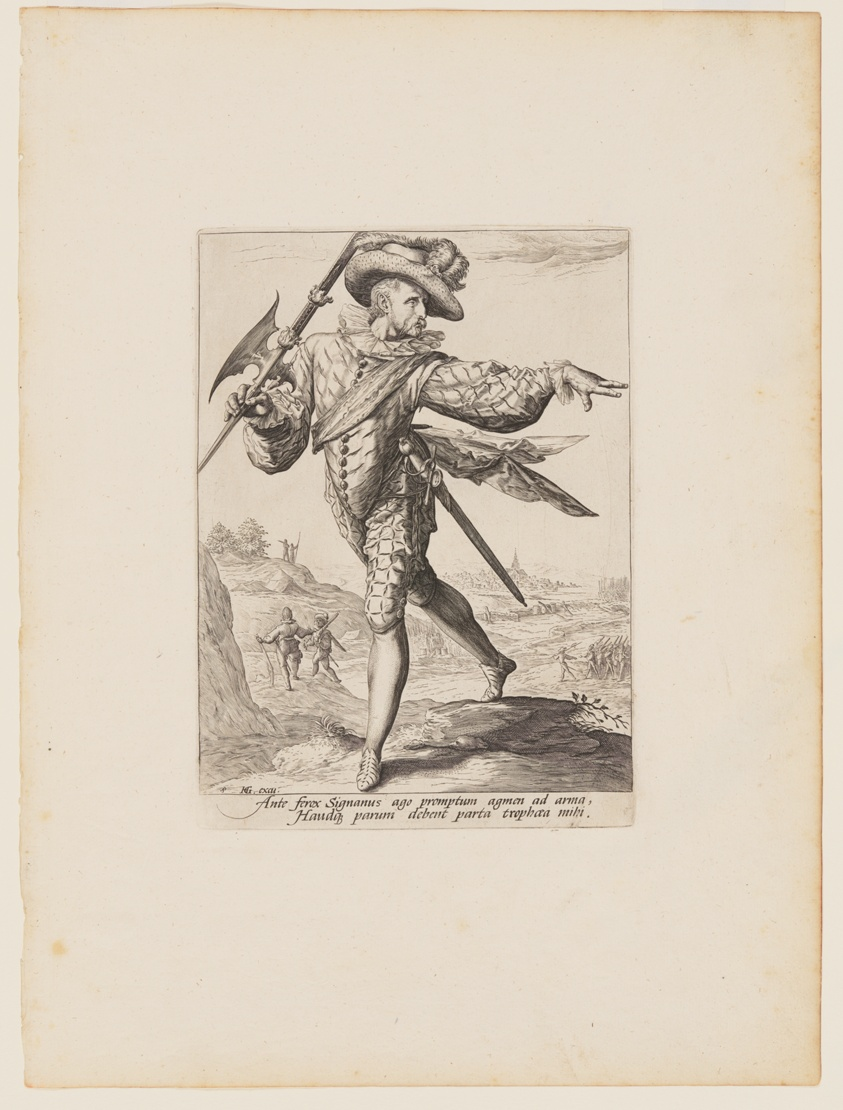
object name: Print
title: Sergeant, from Officers and Soldiers of the Bodyguard of Emperor Rudolph II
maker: Jacques de Gheyn II (Dutch, 1565–1629); after Hendrick Goltzius (Dutch, 1558–1617)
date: 1587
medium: Engraving on ivory laid paper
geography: Netherlands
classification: engraving; paper; print; prints and drawing